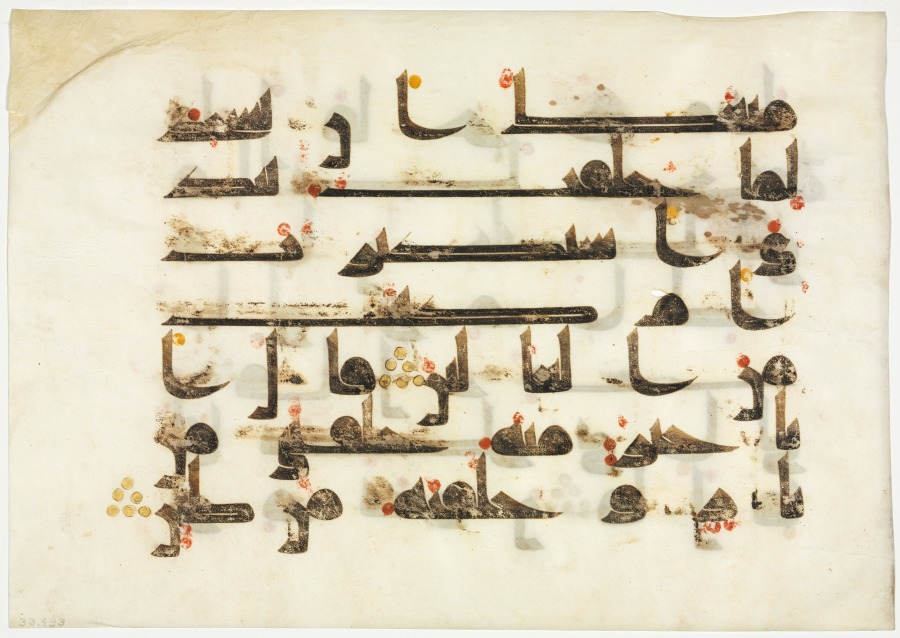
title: Folio from a Qur'an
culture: Probably Egypt, Abbasid period (750–1258)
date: 800s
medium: Opaque watercolor, ink, and gold on parchment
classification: Drawing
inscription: Recto: Sura al-Saad (38: 77-part 75-76). Verso: Sura al-Saad (38: part 77-80).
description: The sacred book of Islam, the Qur'an is believed by Muslims to be a literal transcription of the word of God, spoken in Arabic to the Prophet Muhammad (died 632). In order to convey the importance of the divine word, Arabic calligraphy—sometimes highly elaborate and embellished with gold—was used to create copies of the Qur'an. This folio was written in the oldest style of Arabic calligraphy, called Kufic script, used in earliest surviving copies of the Qur'an. The wide format of the page is well suited to this style of Kufic that has elongated, horizontal strokes. Vowels are indicated by red dots, and the triangles of gold dots mark the end of each verse. The text on the recto recounts an argument between God and Lucifer. Proud Lucifer declares himself superior to humans because he was formed from fire, while humans were molded from clay. In the verses on the verso, God casts Lucifer out of heaven as punishment for his pride.